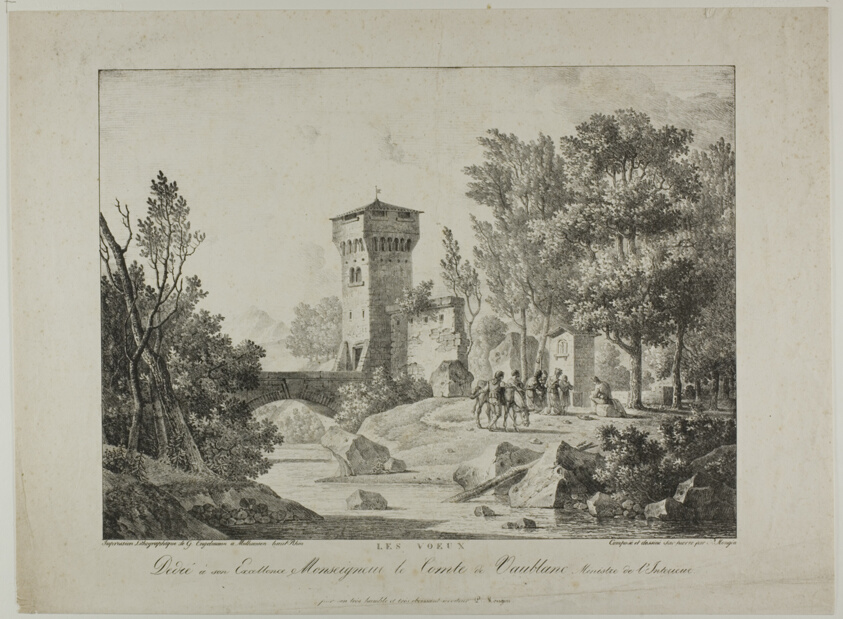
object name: Print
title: Prayers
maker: Pierre-Antoine Mongin (French, 1761-1827); Gottfried Engelmann (French, 1788-1839)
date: 1816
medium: Lithograph in black on ivory wove paper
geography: Paris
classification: lithograph; print; prints and drawing